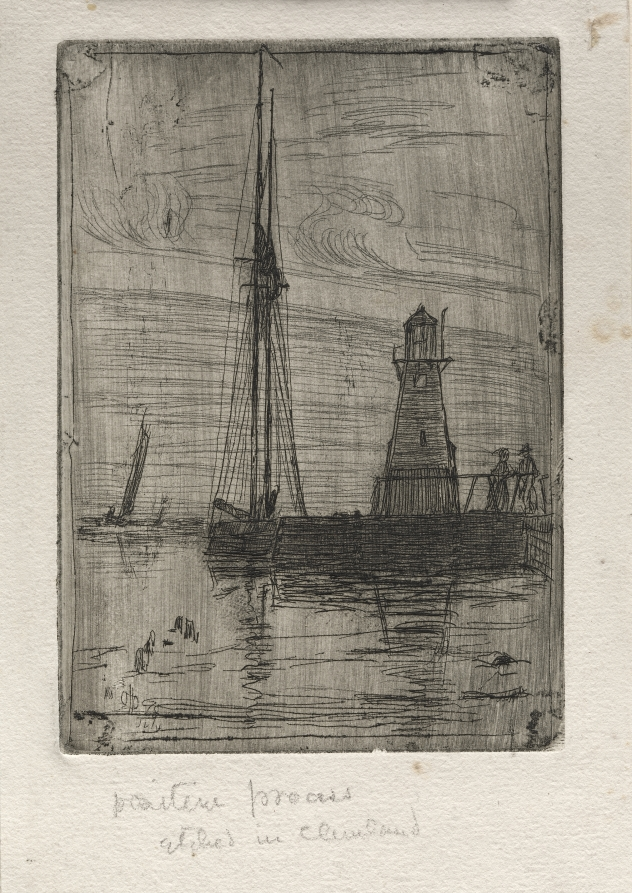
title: River Pier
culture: America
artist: Otto H. Bacher (American, 1856–1909)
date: 1890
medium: etching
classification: Print